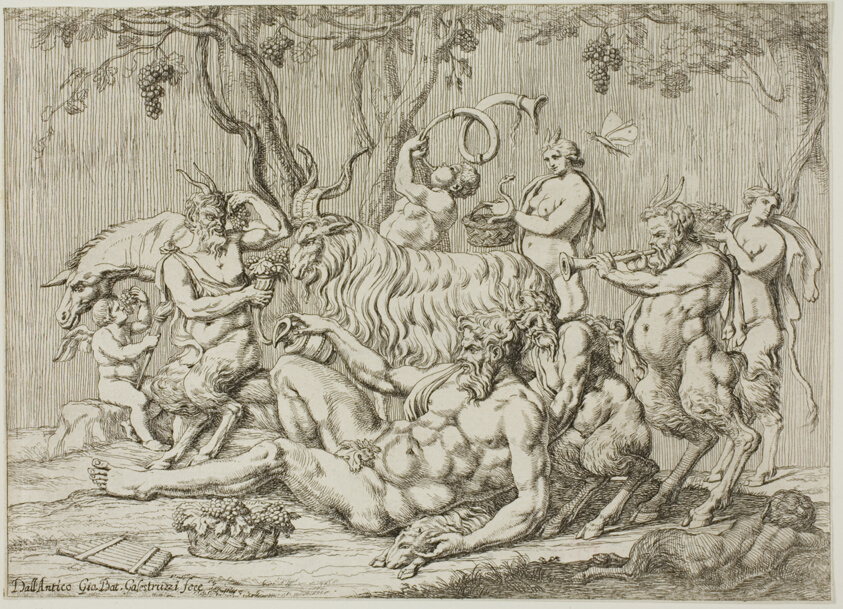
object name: Print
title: Silenus Reclining with Goats and Satyrs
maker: Giovanni Battista Galestruzzi (Italian, 1615-c.1669)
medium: Etching on paper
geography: Italy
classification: etching; print; prints and drawing